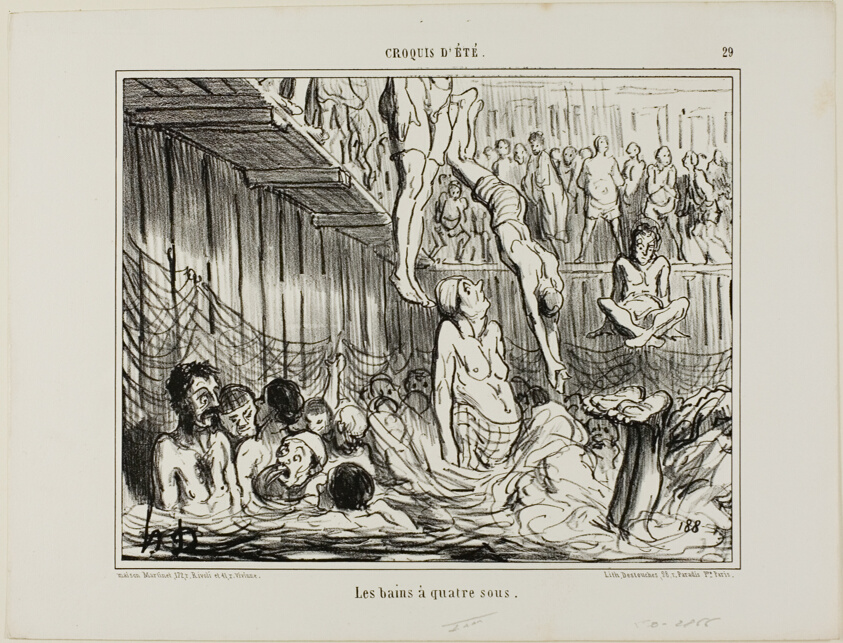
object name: Print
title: The Bath at 4 Sous, plate 29 from Croquis D'été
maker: Honoré Victorin Daumier; French, 1808-1879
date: 1858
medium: Lithograph in black on off-white wove paper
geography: France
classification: lithograph; print; prints and drawing